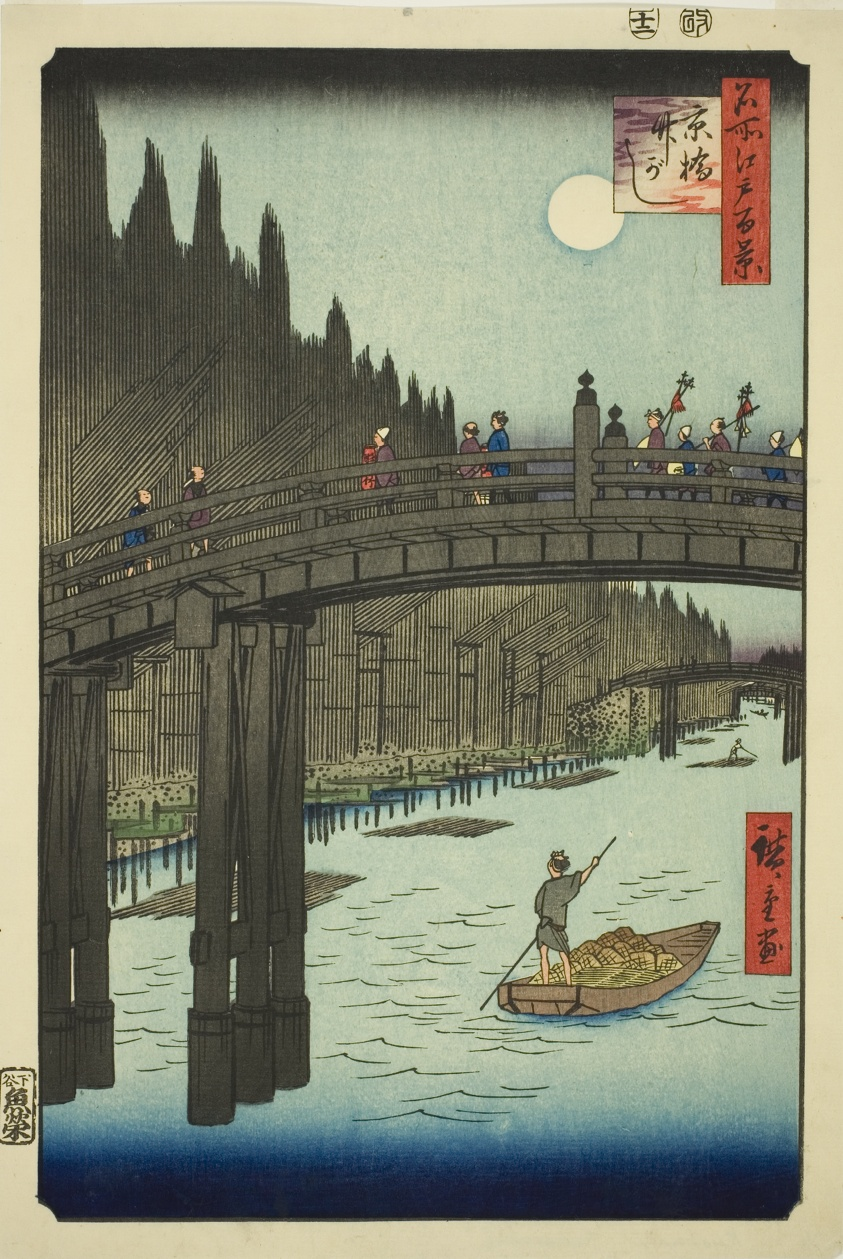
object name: Print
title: Bamboo Yards and Kyo Bridge (Kyobashi Takegashi), from the series "One Hundred Famous Views of Edo (Meisho Edo hyakkei)"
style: Japanese (culture or style)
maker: Utagawa Hiroshige 歌川 広重; Japanese, 1797-1858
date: 1857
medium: Color woodblock print; oban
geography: Japan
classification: woodblock print; print; asian art